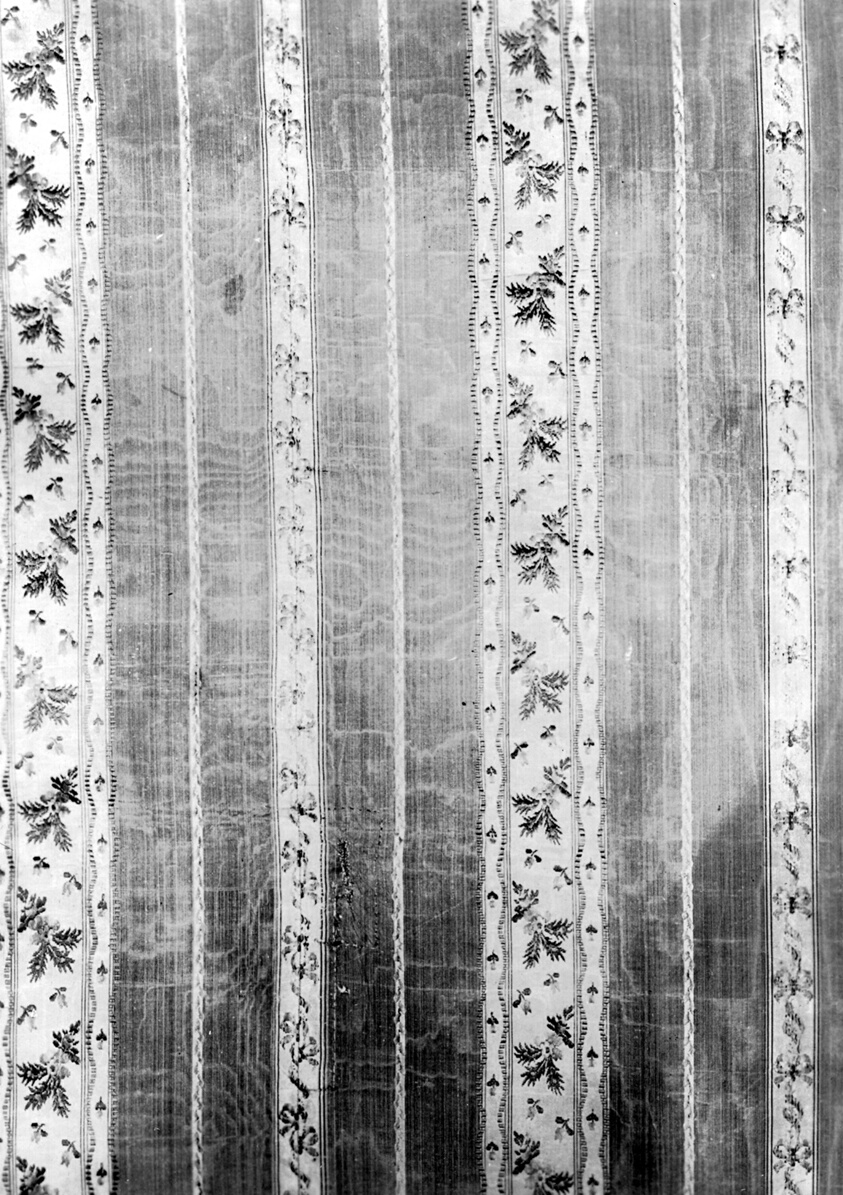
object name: Textile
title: Panel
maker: France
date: Louis XVI period, 1774–1792, 1775/1800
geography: France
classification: textile; weaving